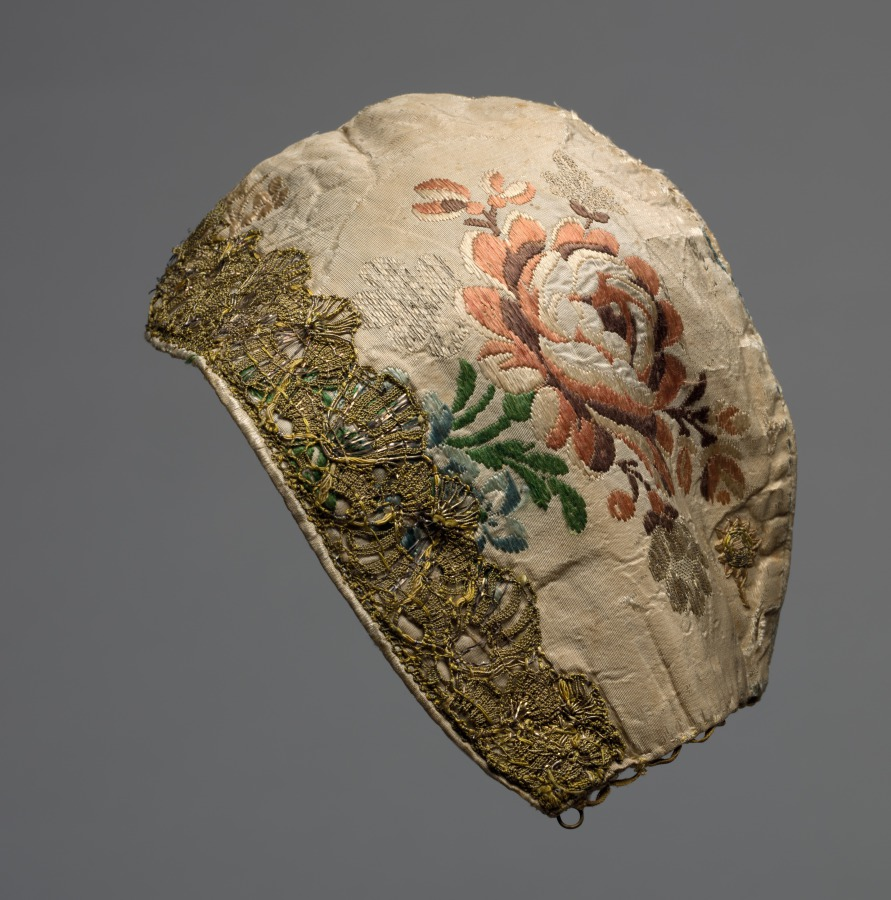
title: Cap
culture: France, Strasbourg, mid-18th century, Period of Louis XV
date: mid 1700s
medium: corded silk damask and metallic thread, edge embroidered with gold lace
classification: Garment